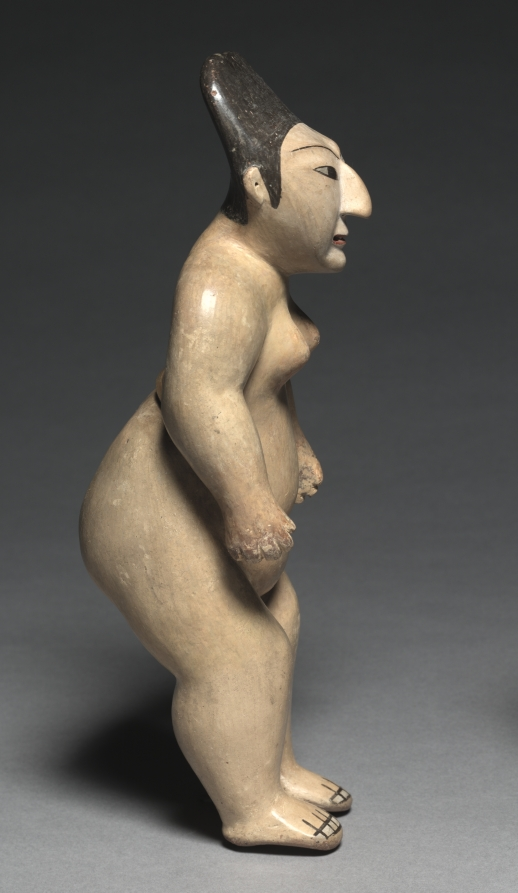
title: Female Figure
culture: Peru, South Coast, Nasca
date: 100 BCE–700 CE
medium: earthenware with colored slips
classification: Sculpture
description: This figure, which may once have worn small garments, might be a tomb offering. Her tapered head reflects the practice of cranial shaping, which may identify her social group and serve as a mark of beauty. Her fleshy hips likely refer to human and plant fertility, since food is the source of such bodily wealth. Her identity is unknown.